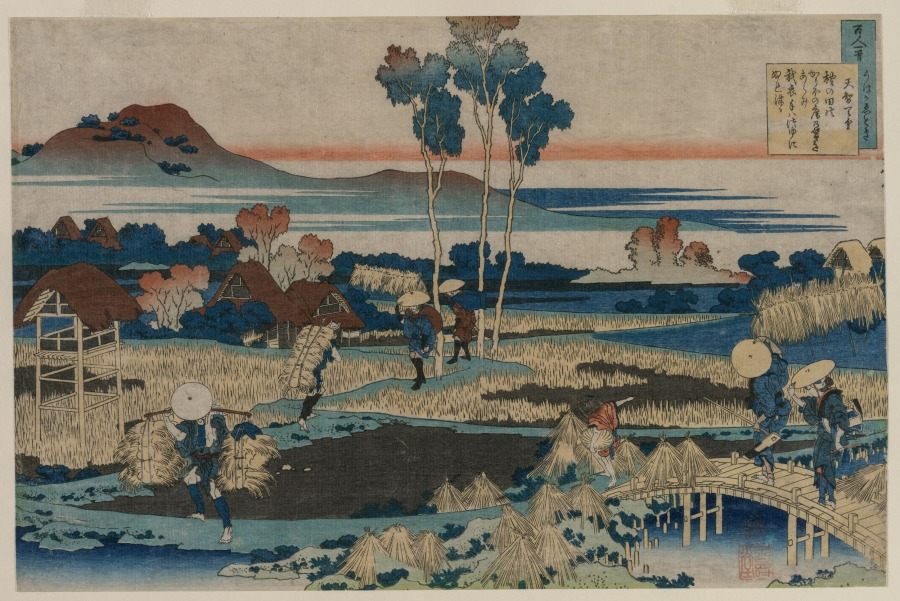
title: Poem by Emperor Tenchi, from the series One Hundred Poems by One Hundred Poets Explained by the Nurse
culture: Japan, Edo period (1615–1868)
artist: Katsushika Hokusai (Japanese, 1760–1849)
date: 1835–36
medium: color woodblock print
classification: Print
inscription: Signature: Zen Hokusai (trimmed) Artist Seal: Manji (trimmed) Publisher: Nishimuraya Yohachi (Eijudo) Censorship Seal: Kiwame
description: This autumn landscape with rice farmers and travelers is from Katsushika Hokusai’s series of prints inspired by the anthology One Hundred Poems by One Hundred Poets (Hyakunin isshu uba ga etoki). While traveling through the countryside, like the two figures in the center, a sudden storm forced the Emperor Tenchi (reigned 661–72) to take shelter in a rice farmer’s hut. The experience produced tears of sympathy for the common people toiling under heavy burdens and living in rough, flimsy homes. The poem at the upper right next to the cartouche reads: Lying on the rough Mats of rice-harvest guards In the autumn fields, I find the sleeves of my robe wet. Is the dew so heavy?